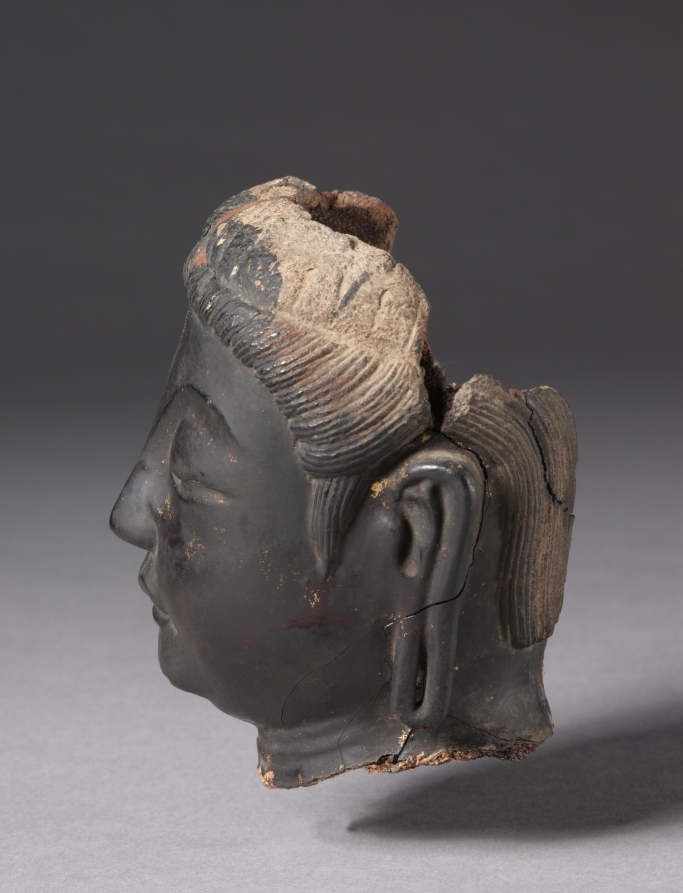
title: Head of Bodhisattva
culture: Japan, Nara period (710–94)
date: 700s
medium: dry lacquer with traces of gilding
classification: Sculpture